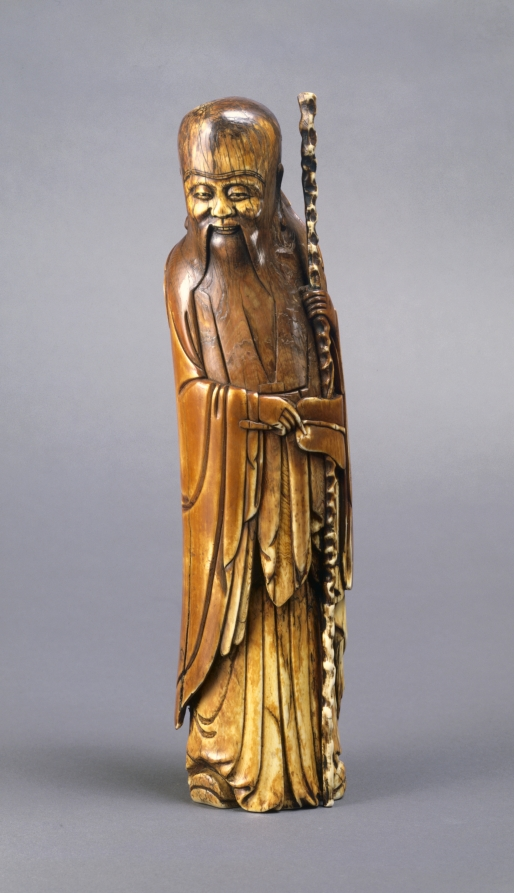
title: Shoulao (The God of Longevity)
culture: China, Ming dynasty (1368–1644)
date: c. 1580–1644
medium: ivory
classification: Ivory